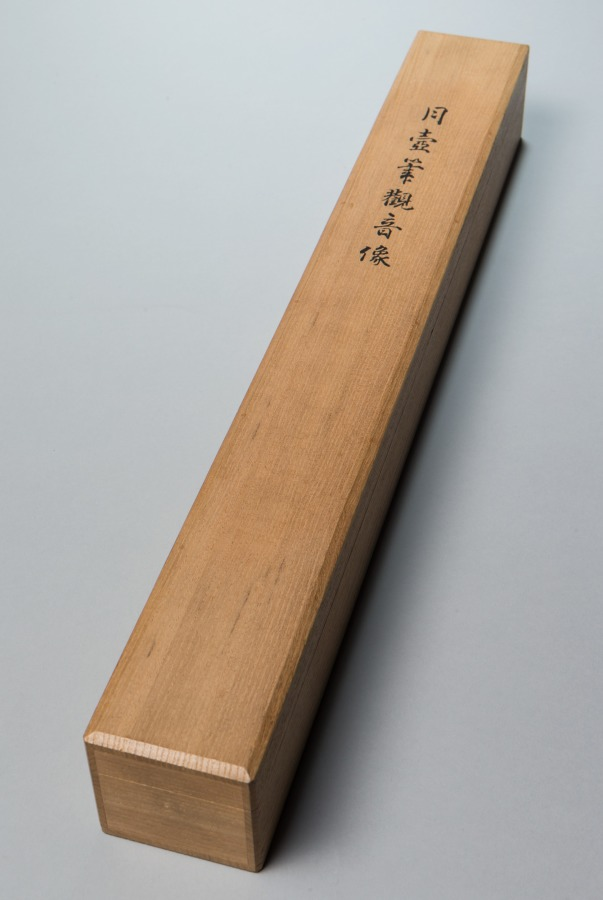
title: White-Robed Guanyin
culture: China, Southern Song dynasty (1127-1279)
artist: attributed to Zhang Yuehu (Chinese, active 1200s)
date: late 1200s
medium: Hanging scroll; ink on paper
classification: Painting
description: The figure here sits on a rocky elevation representing Potalaka in the Southern Sea, Avalokitesvara’s island home. A vase with a bamboo sprig holds pure water, the nectar of life. Bamboo shines through the figure’s halo, a way of seeing the illusionary world through the Buddhist truth. Avalokitesvara (Guanyin in Chinese), the bodhisattva of compassion, was integrated into the Chan Buddhist canon of venerated beings. In this context, the bodhisattva is often depicted in its female manifestation as the White-Robed Guanyin. The worship of the feminine White-Robed Guanyin has its origins on Mount Tianzhu in Hangzhou, where Qian Liu (852–932), ruler of the Wuyue kingdom, established the Upper Tianzhu Monastery to venerate her image.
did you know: As an artist, Zhang Yuehu was better known in Japan than in his own country.